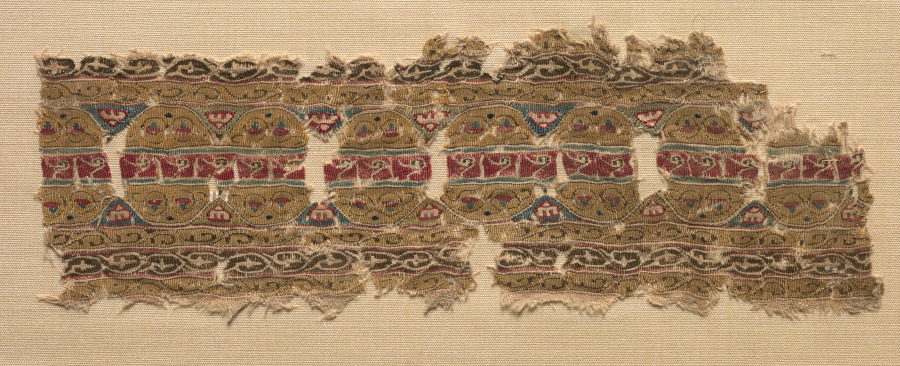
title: Fragment of Tiraz-Style Textile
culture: Egypt, Fatimid period, Caliphate of al-Amir or al-Hafiz, AH 495-544, 12th Century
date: 1101 – 1149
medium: tabby ground with inwoven tapestry ornament; linen and silk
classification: Textile